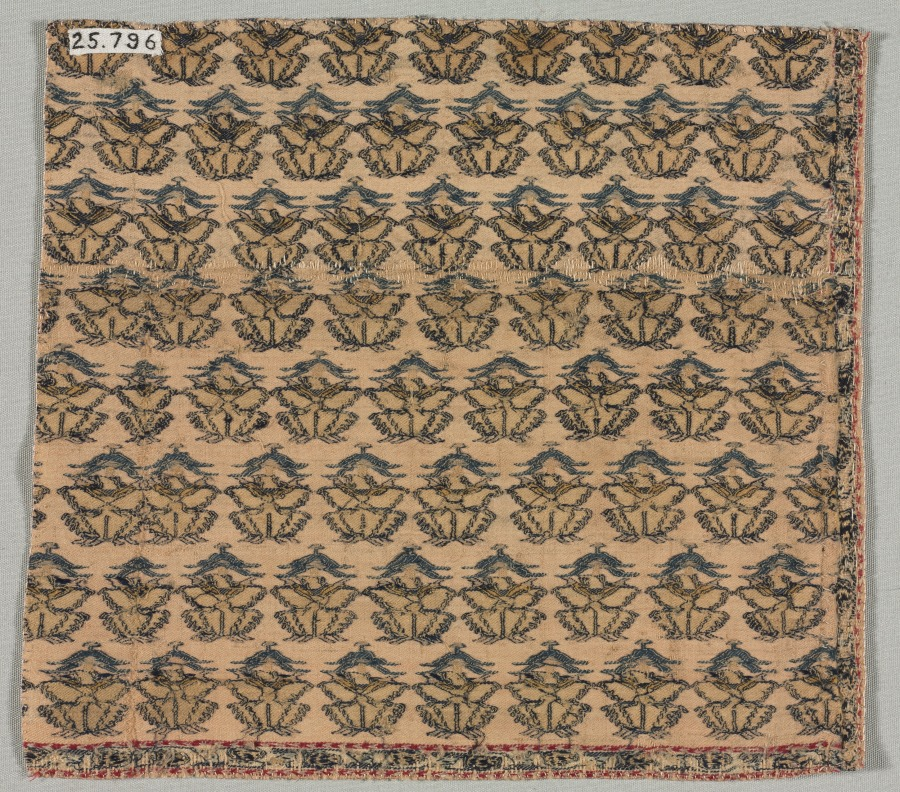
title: Corner Fragment of a Shawl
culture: India, Kashmir, late 18th century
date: late 1700s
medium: tapestry twill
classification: Textile